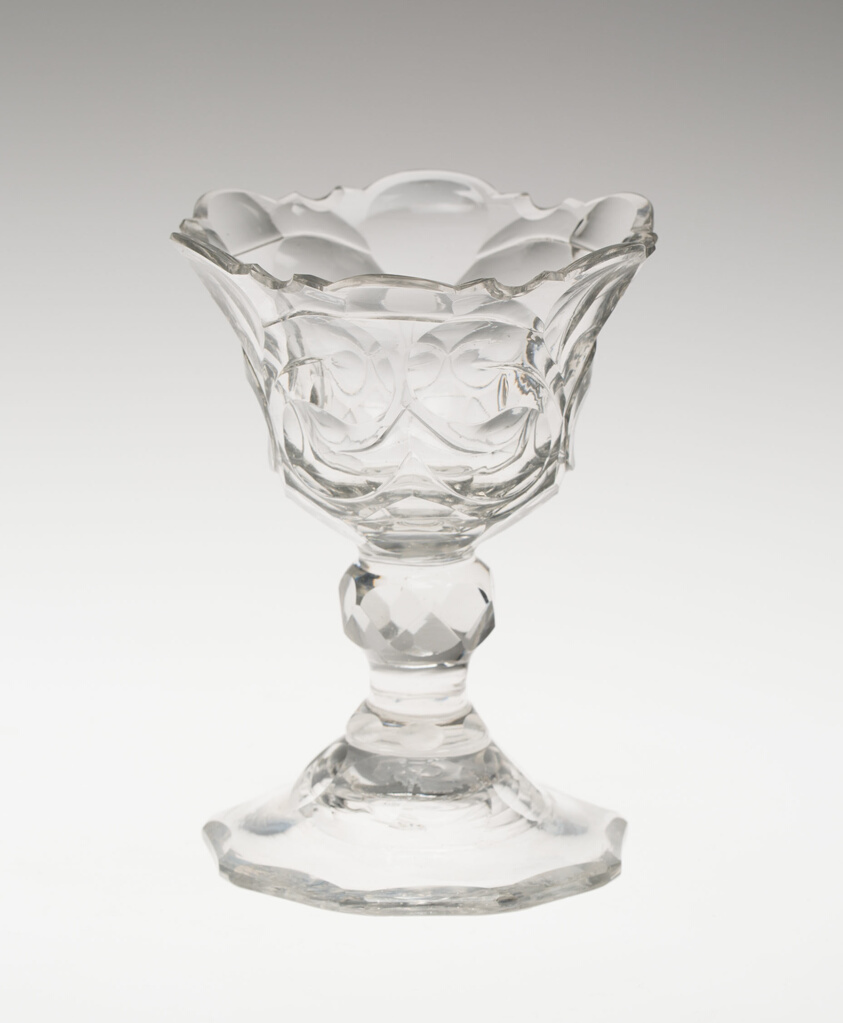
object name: Glass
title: Salt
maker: England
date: c. 1720/40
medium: Glass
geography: England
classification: glass